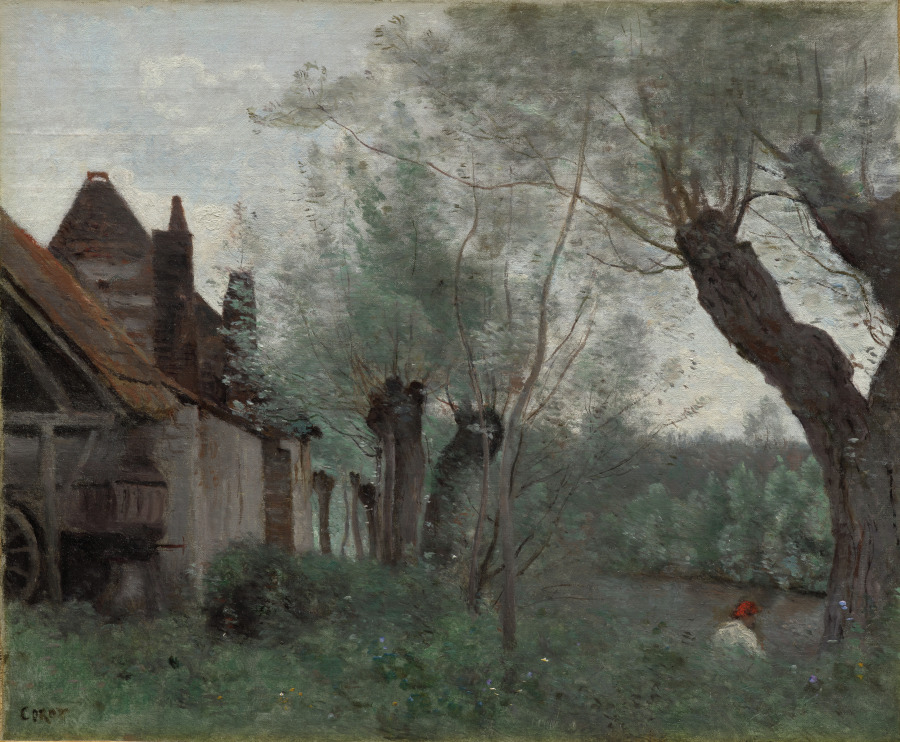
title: Willows and Farmhouse at Sainte-Catherine-lès-Arras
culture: France, 19th century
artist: Jean Baptiste Camille Corot (French, 1796–1875)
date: 1871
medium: oil on fabric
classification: Painting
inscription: Signed lower left: corot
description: With its quiet water and sky, fluffy trees, and other foliage flecked with light, this picture exemplifies the style that won Corot success with a wide public. It was painted during the artist's stay at Arras (about 100 miles north of Paris) in 1871.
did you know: Corot began his career as a draper and his exposure to the colors and textures of fabrics helped him develop an astute aesthetic sense.